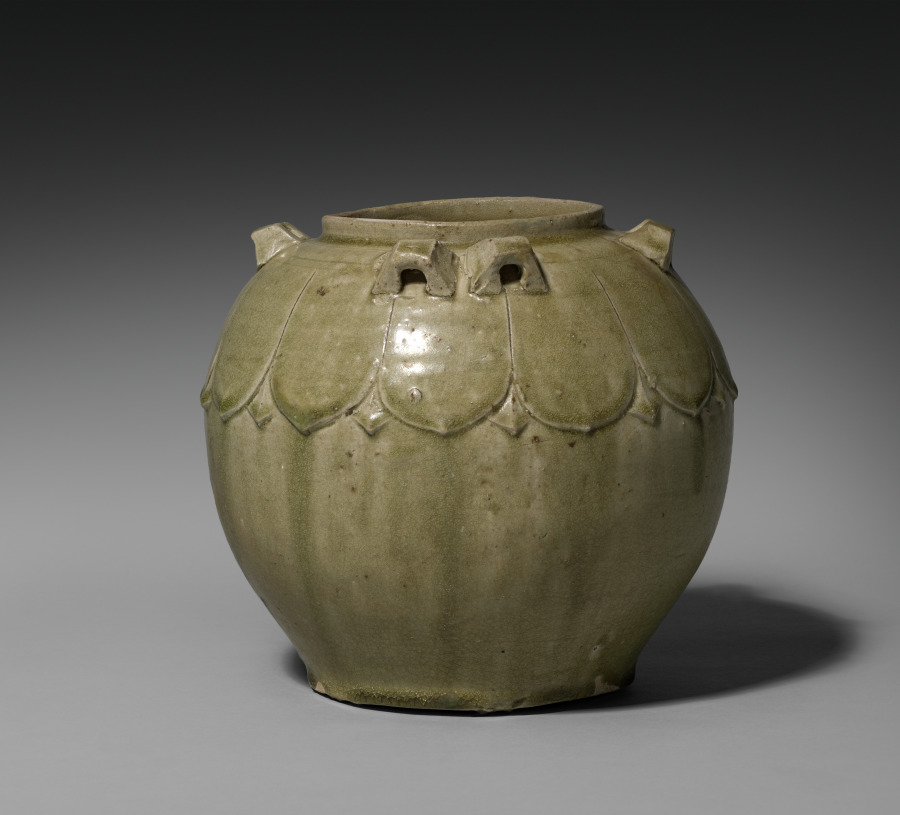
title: Covered Jar with Carved Lotus Petals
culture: China, Northern Dynasties period (386-581)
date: 386–581 CE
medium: Glazed stoneware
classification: Ceramic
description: This jar still has its original cover, which is rare among surviving examples. Its missing knob most likely had the shape of a lotus bud. Beautifully carved lotus petals cover the vessel’s shoulder and lid under a translucent green glaze. In Buddhism, the lotus is a flower symbolizing purity and detachment from worldly affairs; its presence suggests that this vessel was meant to be used in a religious context. The well-crafted double loop handles may have held a silk cloth or other textile that would have been folded over the lid to keep it in place. This aesthetic prefigures the celebrated green celadons in adjacent regions.